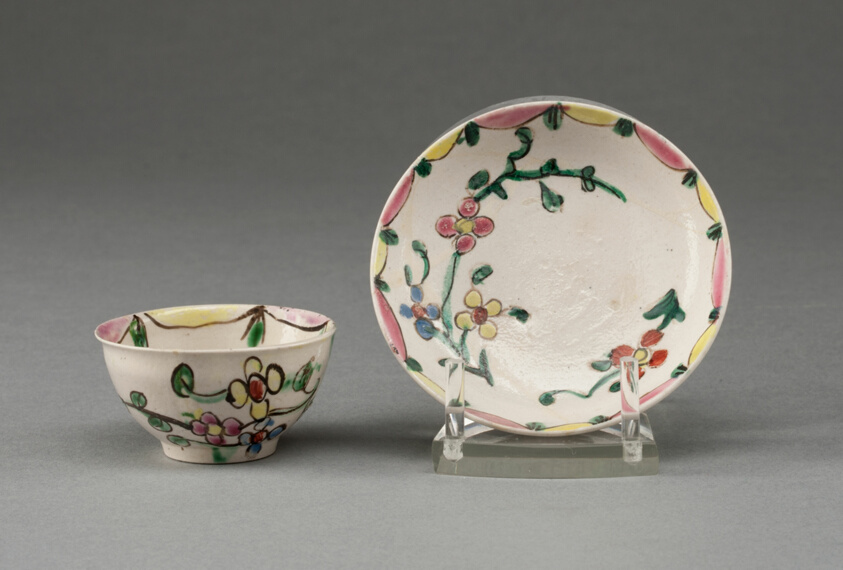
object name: Ceramics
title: Miniature Cup and Saucer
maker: Staffordshire, England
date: 1760/69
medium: Salt-glazed stoneware, polychrome enamels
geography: Staffordshire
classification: drinking vessel; salt-glazed stoneware; european decorative arts; pottery; stoneware; ceramics